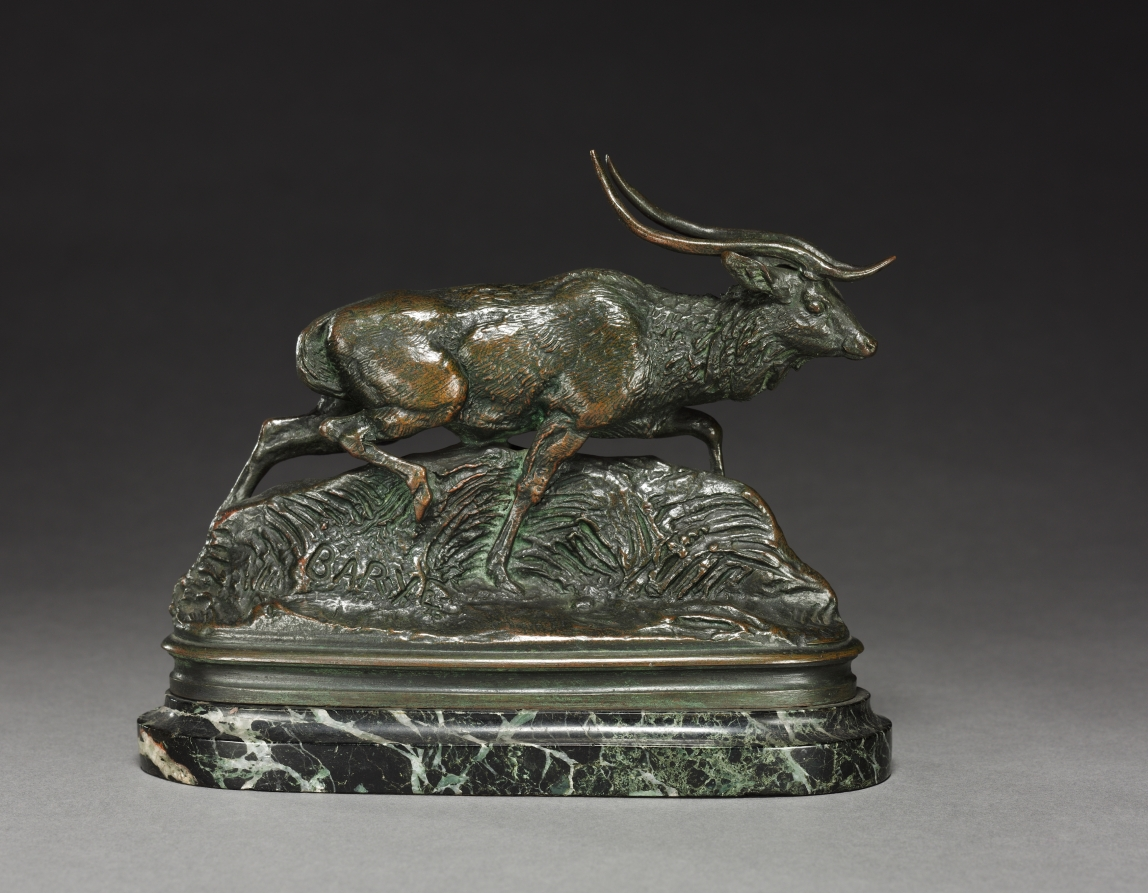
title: Axis Deer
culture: France, 19th century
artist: Antoine-Louis Barye (French, 1796–1875)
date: 19th century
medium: bronze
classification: Sculpture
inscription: Signed: "Barye"; faintly inscribed in small letters: "BARYE 21"